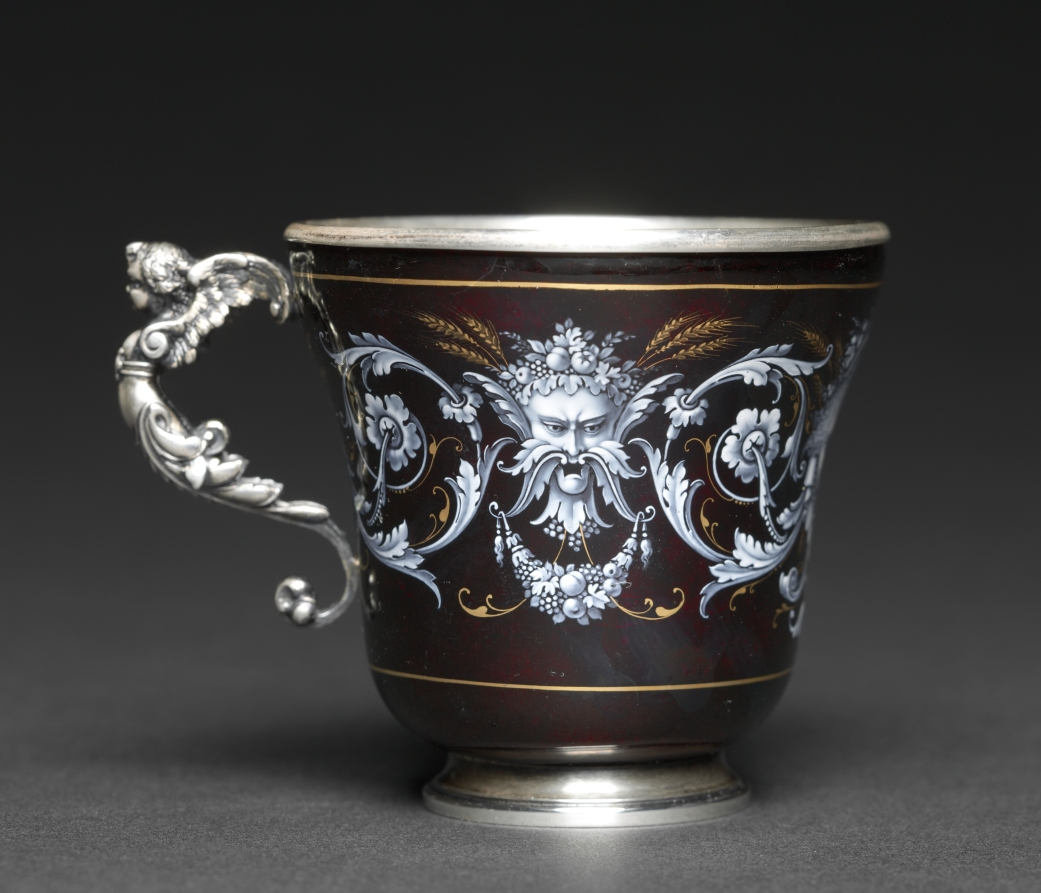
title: Cup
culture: France, 19th century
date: c.1880–1900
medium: silver, enamel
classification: Enamel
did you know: This cup and saucer were made during the Belle Epoque or "Beautiful Era" in France.